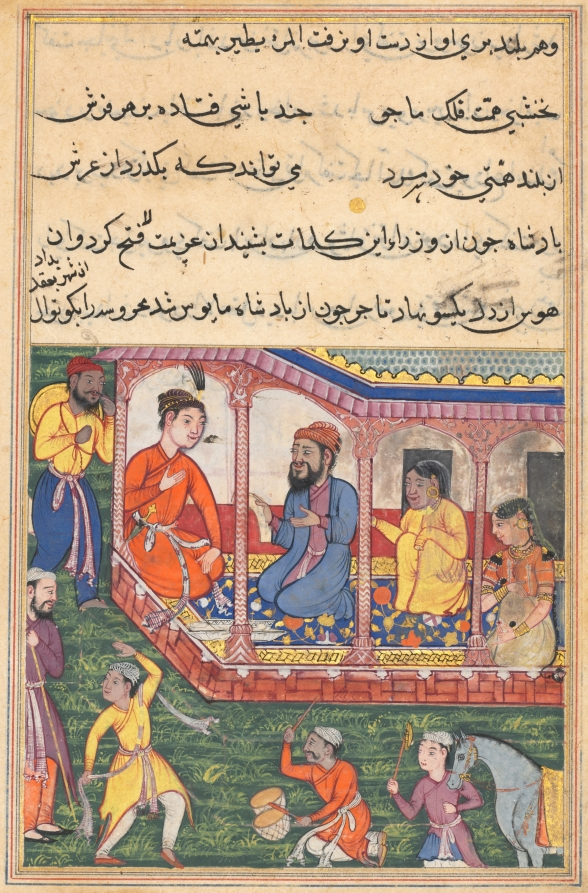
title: Mahrusa’s marriage to the prefect of the city, from a Tuti-nama (Tales of a Parrot): Thirty-sixth Night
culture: Mughal India, court of Akbar (reigned 1556–1605)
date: c. 1560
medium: gum tempera, ink, and gold on paper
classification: Painting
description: In the lower register, a musician, a dancer, and other revelers happily celebrate the wedding. The prefect, dressed in orange, sits on the left of the wedding scene while Mahrusa herself sits on the far right. Mahrusa, who has been rejected by the king, continues to wonder why he refused to marry her.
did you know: The old woman in yellow is Mahrusa’s duenna, or governess.